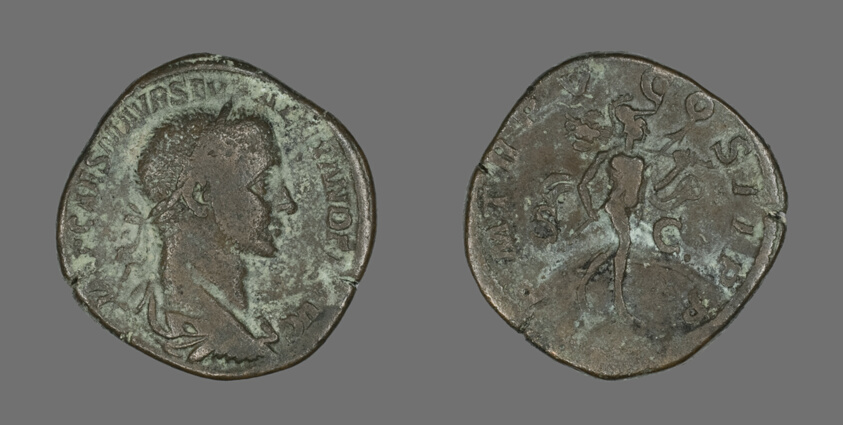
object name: Coin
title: Sestertius (Coin) Portraying Emperor Severus Alexander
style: roman (ancient, style or period)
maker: Roman, minted in Rome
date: 266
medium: Bronze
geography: Roman Empire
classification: coin; ancient art